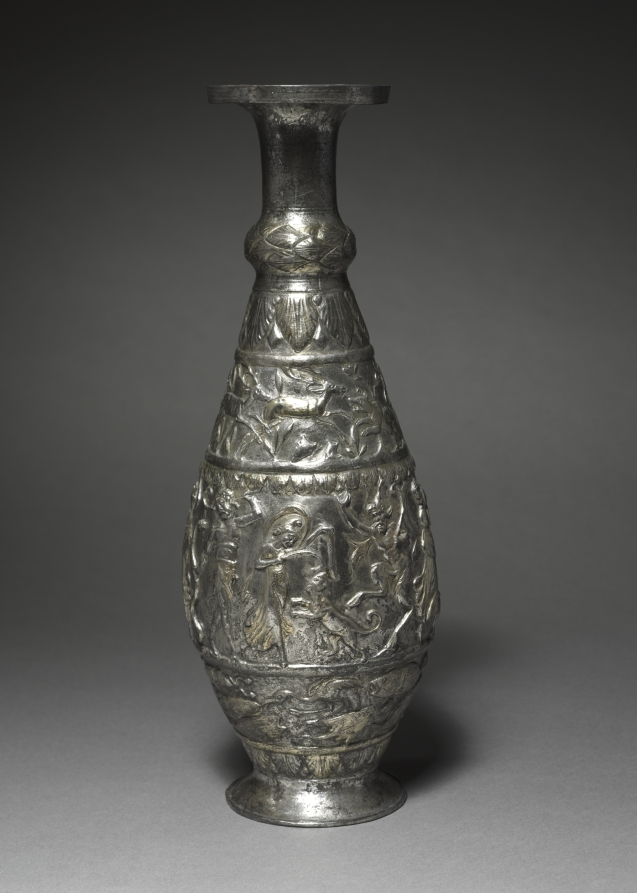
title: Ewer (Pitcher) with Game, Seafood, and Wine Scenes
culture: Byzantium, Syria(?), Byzantine period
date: late 300s CE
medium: silver with traces of gilding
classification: Metalwork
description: This magnificent pitcher, called a ewer, was almost certainly meant for serving wine in the dining room of a wealthy home. On its surface are images in three bands representing the expected bounty of the hunt. Deer pursued by a lioness and hares chased by dogs appear in the top band, signifying the wealth of game the owner hoped to have on the family table. In the lowest band are edible sea creatures, while the center features the merry followers of the Roman wine god Bacchus (Dionysos in Greek).